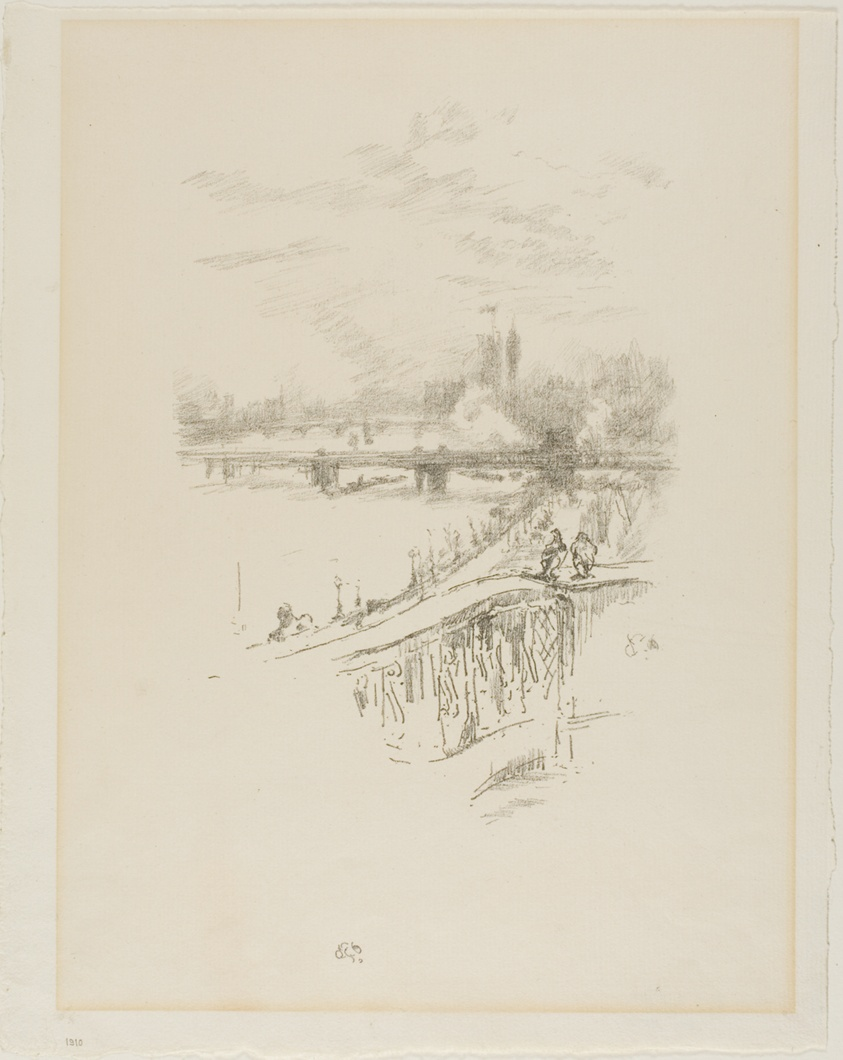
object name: Print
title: Savoy Pigeons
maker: James McNeill Whistler (American, 1834-1903)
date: 1896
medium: Transfer lithograph in black on cream laid paper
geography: United States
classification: transfer lithograph; lithograph; print; prints and drawing; paper